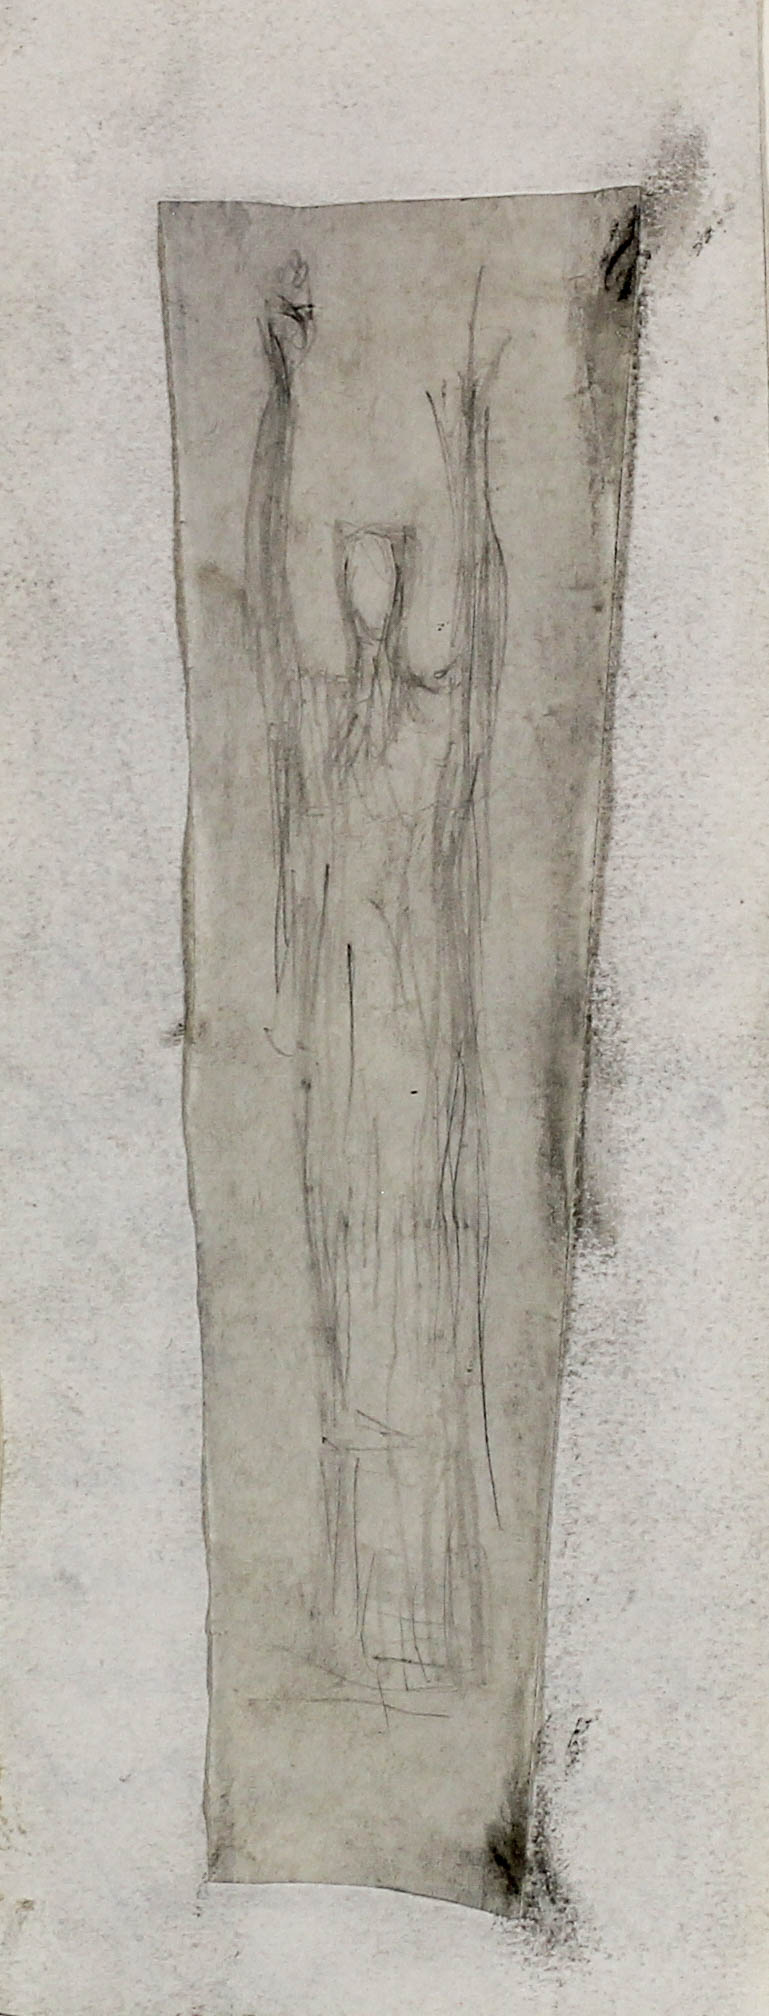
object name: Architectural Drawing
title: Statue of the Republic, Chicago, Illinois, Preliminary Sketch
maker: Augustus Saint-Gaudens (American, 1848–1907)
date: 1891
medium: Graphite on tracing paper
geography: World's Columbian Exposition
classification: architecture; architectural drawing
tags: world's fairs, Chicago World's Fairs